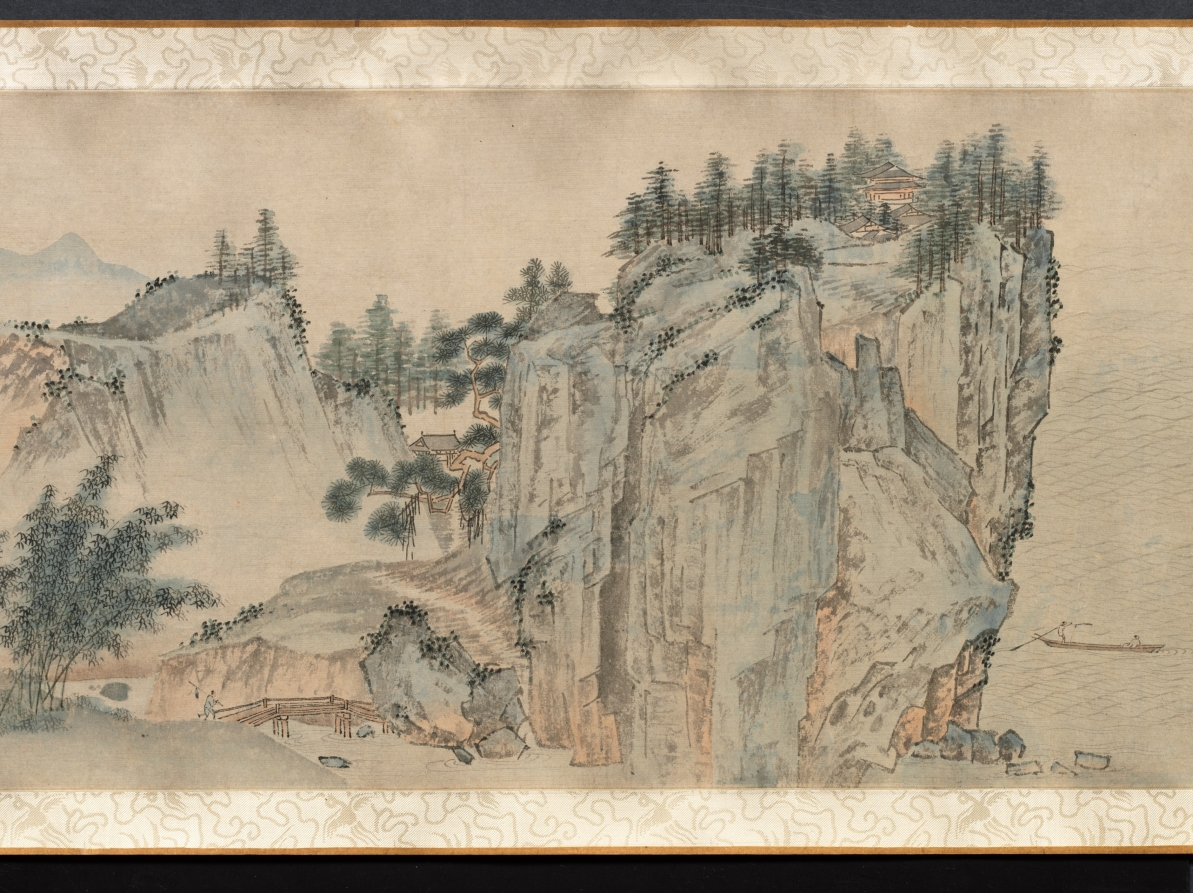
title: Ten Thousand Li of the Yangzi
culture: China, Ming dynasty (1368–1644)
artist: Dai Jin (Chinese, 1388–1462)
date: c. 1400s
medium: Handscroll; ink and color on paper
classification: Painting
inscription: Two colophons at end. Artist's seals: Dai Jin 戴進 and Wenjin 文進.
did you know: Dai Jin is traditionally considered the founder of the Zhe School, a style of landscape painting.